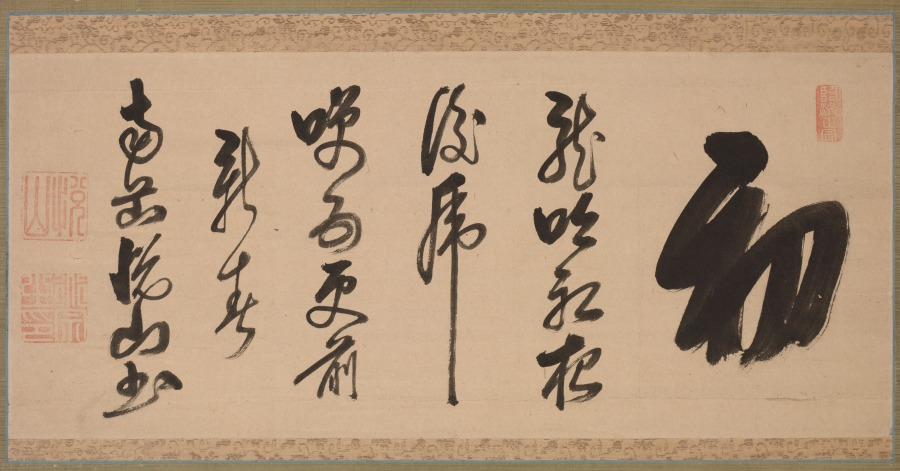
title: Calligraphy in Semi-Cursive Style (xing-caoshu)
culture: China, Qing dynasty (1644–1911)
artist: Yueshan Daozong (Chinese, 1629–1709)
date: c. 1660–1709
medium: Hanging scroll; ink on paper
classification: Calligraphy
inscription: 初/ 龍吟初夜後，虎嘯五更前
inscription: 悅山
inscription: 道宗之印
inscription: Linji zheng zong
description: This spontaneous, bold calligraphy style is characteristic of members of the Japanese Ōbaku school (Huangbo in Chinese) of Chan (Zen in Japanese) Buddhism, which was founded in Japan by Chinese monks in the 1600s. The monk Yueshan emigrated to Japan from the Chinese province of Fujian, taking a priestly post at Manpukuji, the headquarters of the Ōbaku school in Japan. He later became the seventh abbot of the distinguished temple. Yueshan’s calligraphy features rounded characters that allow him to fuse strokes and characters in speedy brush movements. Here the text begins with the large character chu (初, “the beginning”), the initial focus of meditation on the text: The dragon murmurs after sunset. The tiger roars before dawn.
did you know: Ōbaku-style calligraphy favors rounded—rather than angular—brushstrokes. It is not a subtle style of calligraphy, as the Chan monks preferred a bold approach.